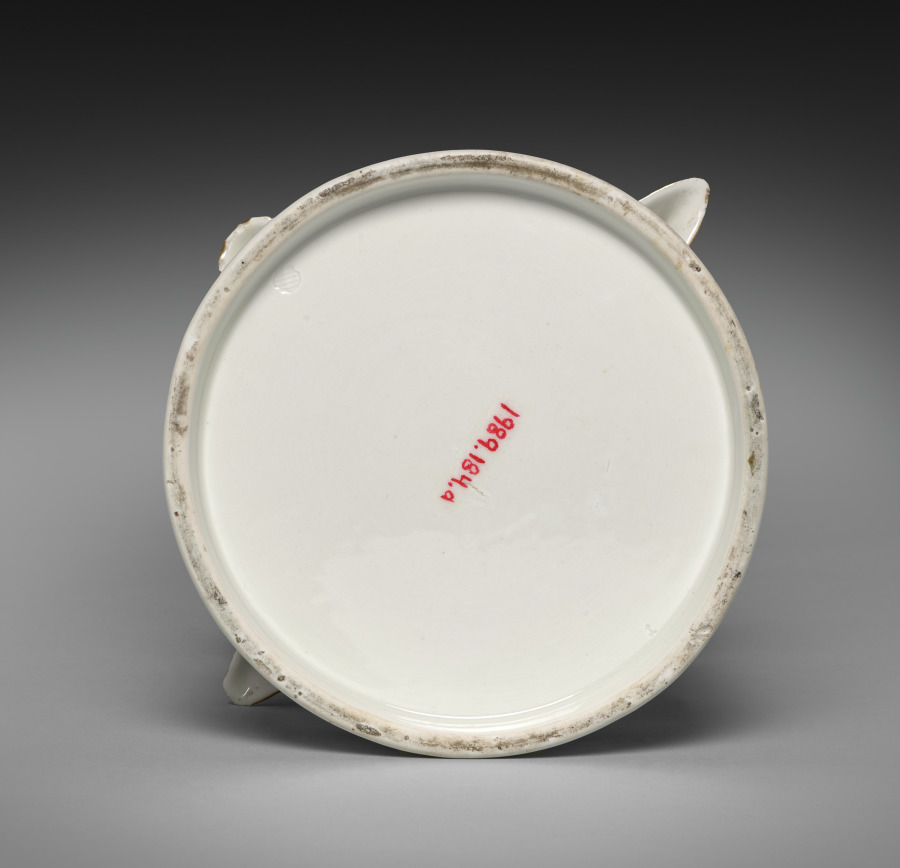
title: Food Warmer (Veilleuse)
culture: Germany, Nymphenburg, 18th century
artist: Nymphenburg Porcelain Factory (German, founded 1747)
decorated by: probably by Georg Christoph Lindemann (German)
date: c. 1758–1760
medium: porcelain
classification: Ceramic